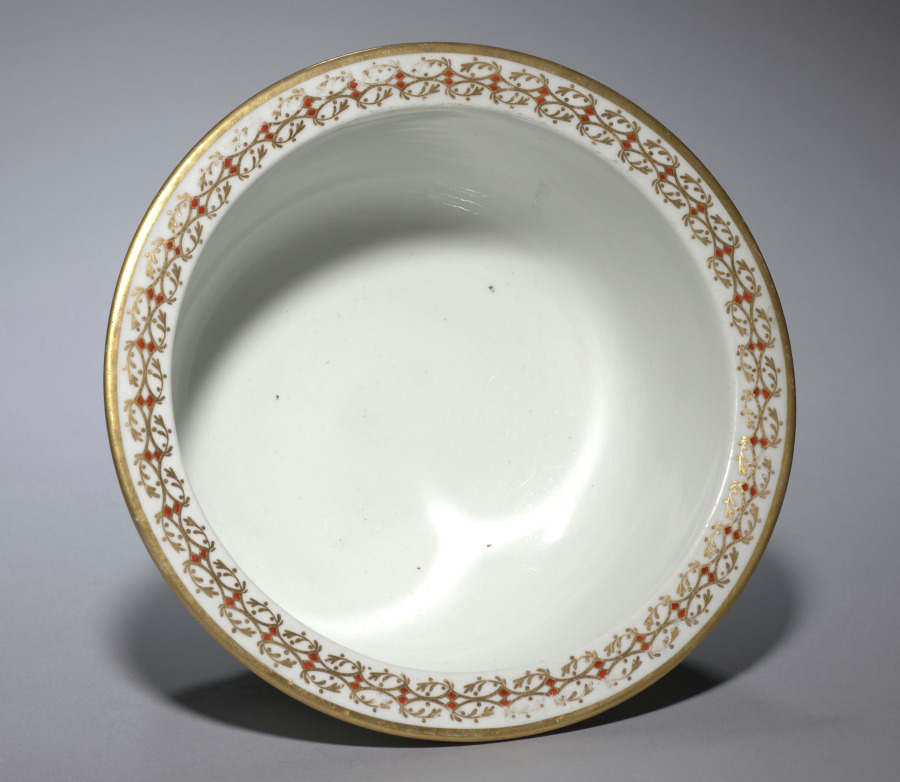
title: Liner for an Ice Pail (2 of 2)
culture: England, late 18th-early 19th Century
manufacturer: Flight & Barr (British)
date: c. 1792–1804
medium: porcelain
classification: Ceramic